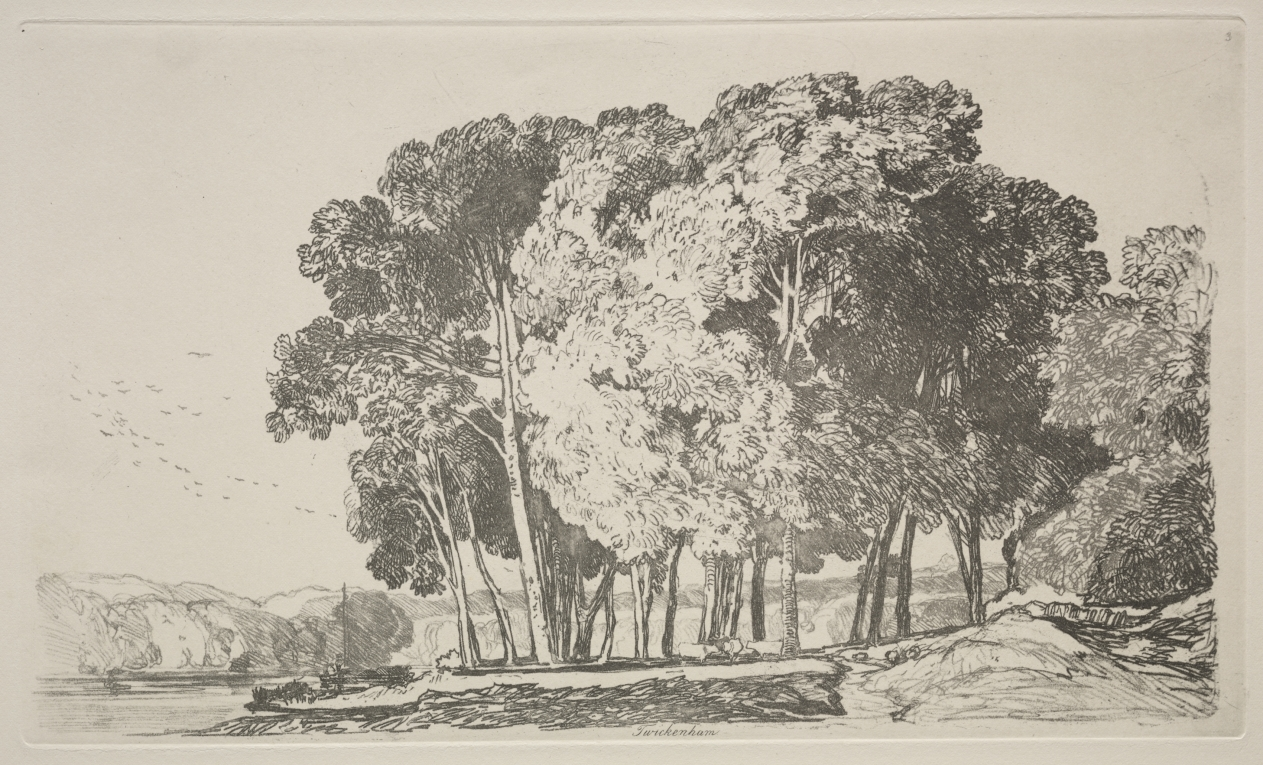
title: Liber Studiorum: Twickenham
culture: England, 19th century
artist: John Sell Cotman (British, 1782–1842)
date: 1838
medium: etching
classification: Print